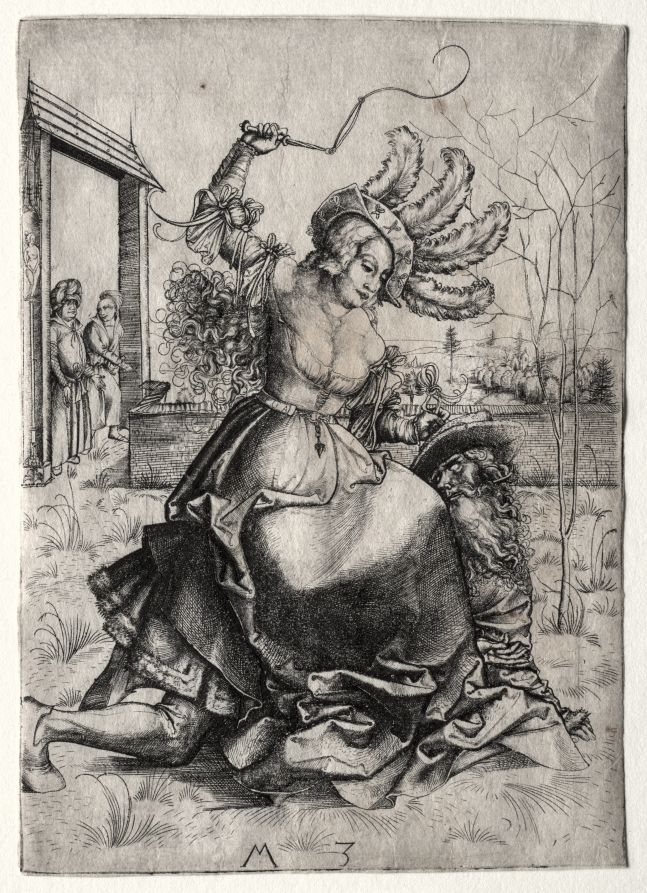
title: Aristotle and Philis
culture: Germany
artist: Master MZ (German)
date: 1500–03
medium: engraving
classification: Print